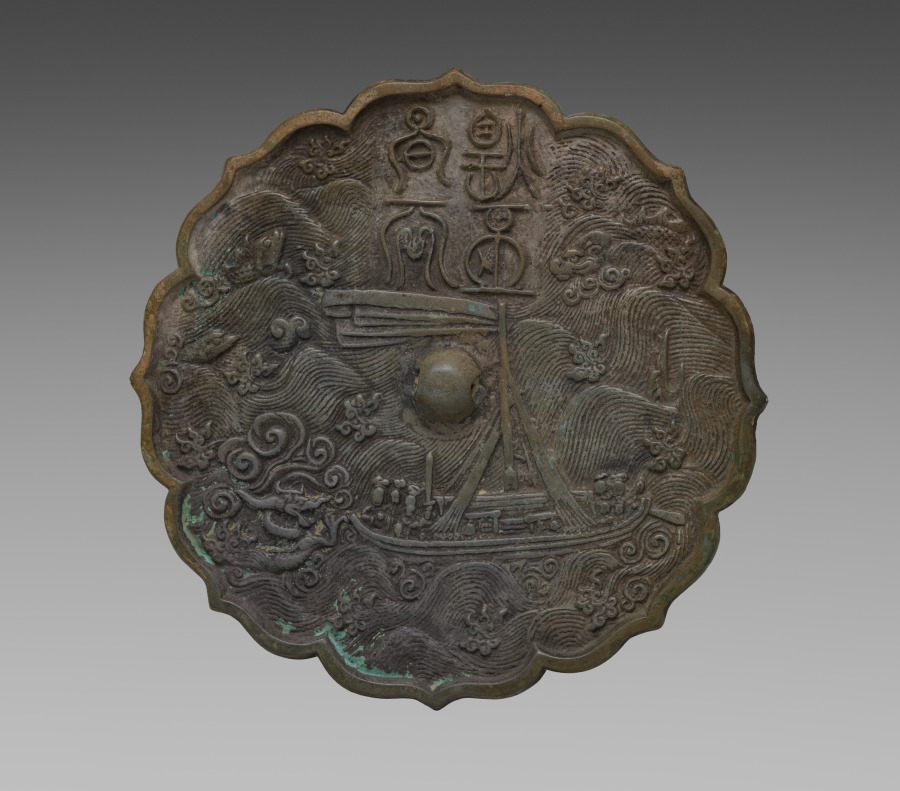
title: Octafoil-shaped Mirror Featuring Ci Fei, the Dragon Slayer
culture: China, Jin dynasty (1115-1234) or Korea, Goryeo dynasty (918-1392)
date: 900s–1300s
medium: bronze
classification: Metalwork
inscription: 煌丕昌天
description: The mythical hero Ci Fei and his victory during his travel through the Yangzi River is depicted on this eight-lobbed mirror. He raises his sword in order to attack sea monsters. On the top, a large inscription in seal script reads “Great and Resplendent is the Heaven.” The mirror is currently thought to be a Chinese work dating to the Jin Dynasty (1115-1234). Recently published excavation reports, however, reveal that this particular type was exclusively unearthed from Korean tombs of the Goryeo period. Some Korean scholars speculate that this Chinese epic was appropriated to celebrate the Goryeo ruling house’s heroic ancestry and this type of mirror was widely distributed as a token of power among Goryeo elite class members.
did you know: The mirror is currently thought to be a Chinese work dating to the Jin Dynasty (1115-1234). Recently published excavation reports, however, reveal that this particular type was exclusively unearthed from Korean tombs of the Goryeo period.